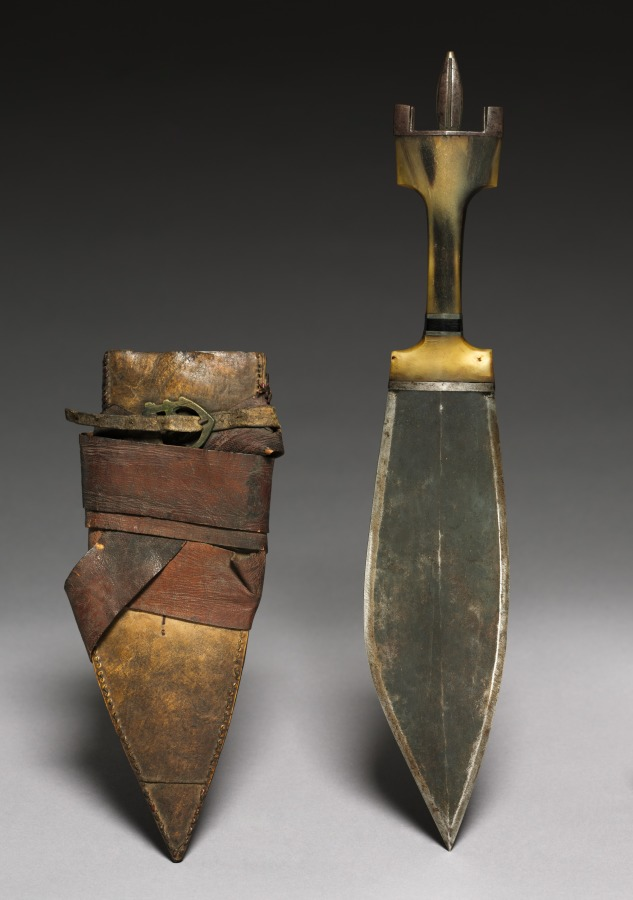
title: Knife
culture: Africa, unknown maker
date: 1800s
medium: Steel, leather or rawhide, and horn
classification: Arms and Armor